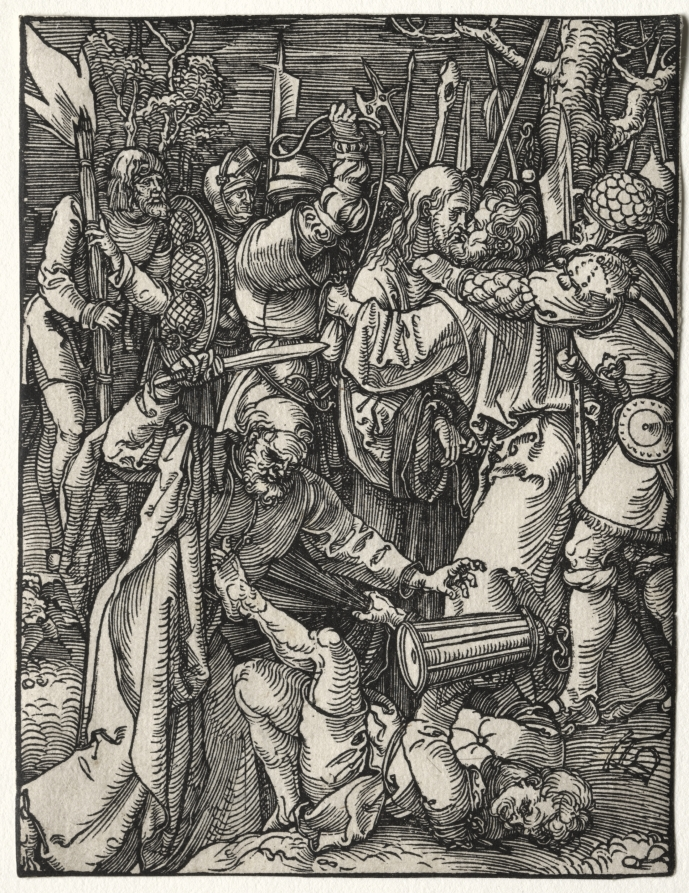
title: The Small Passion: The Betrayal of Christ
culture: Germany, late 15th-early 16th century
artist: Albrecht Dürer (German, 1471–1528)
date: c. 1509–10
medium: woodcut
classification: Print